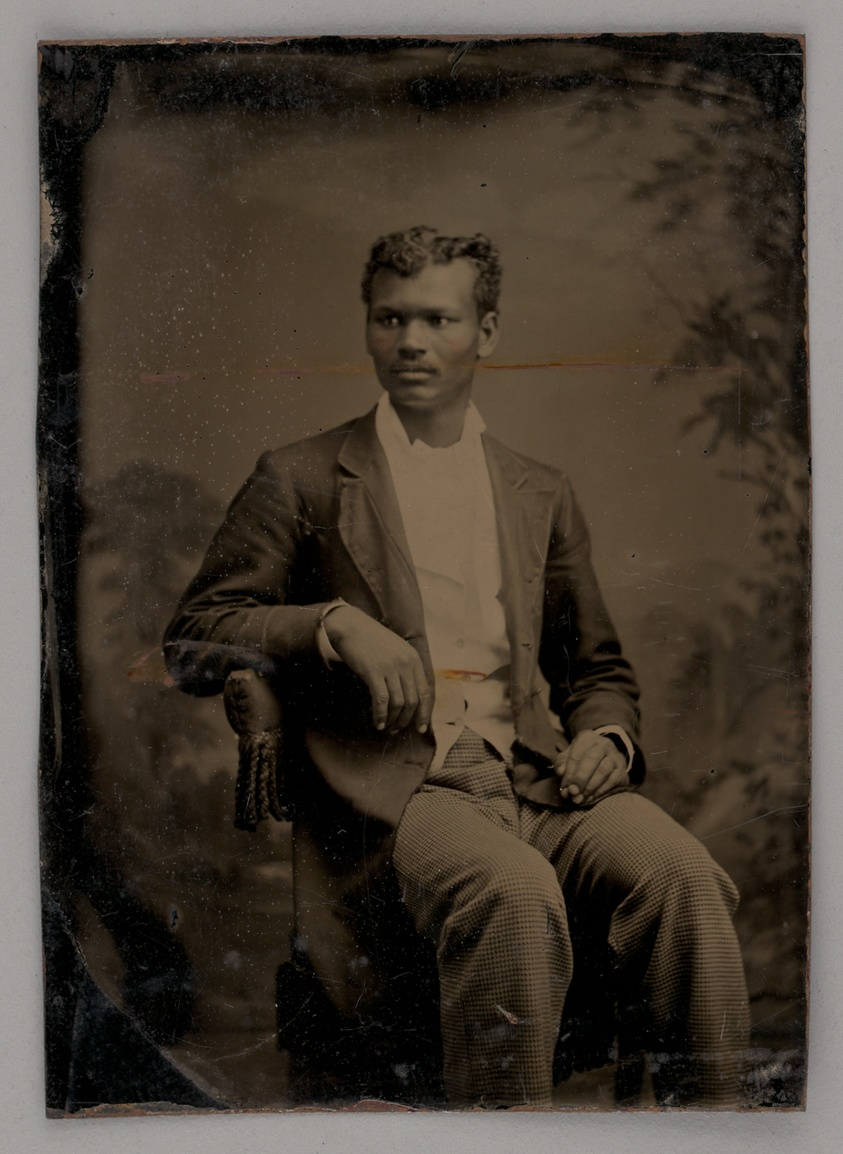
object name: Photograph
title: Untitled (Portrait of a Seated Man)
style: 19th century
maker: Unknown maker; American, 19th century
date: 1875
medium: Tintype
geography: United States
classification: portrait; tintype; photograph; photographic process; photography; portrait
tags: portraits: African American subject, lundberg collection, African American, portraits, portraits: male subject, portrait, Male, men